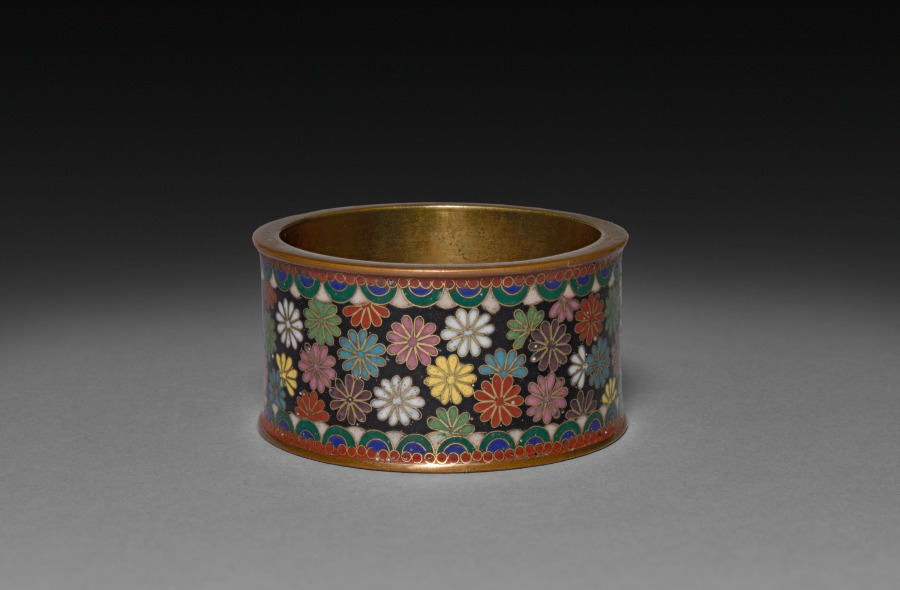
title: Napkin Ring with Flowers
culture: Japan, Meiji period (1868–1912) or Taishō period (1912–26)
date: early 1900s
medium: cloisonne enamel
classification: Enamel